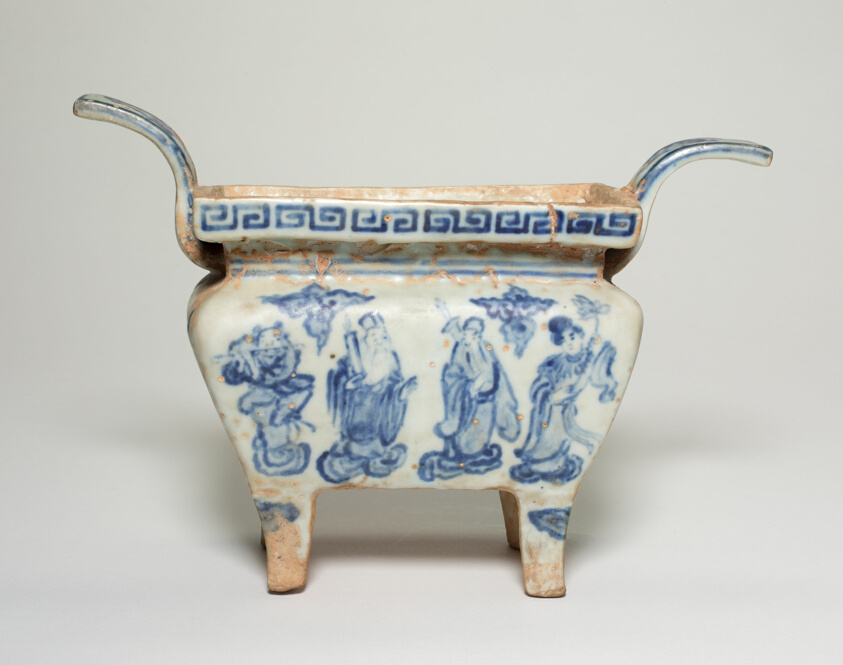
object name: Vessel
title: Vessel with Eight Figures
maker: China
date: Ming dynasty (1368–1644)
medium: Stoneware with underglaze blue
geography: China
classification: stoneware; asian art; ceramics